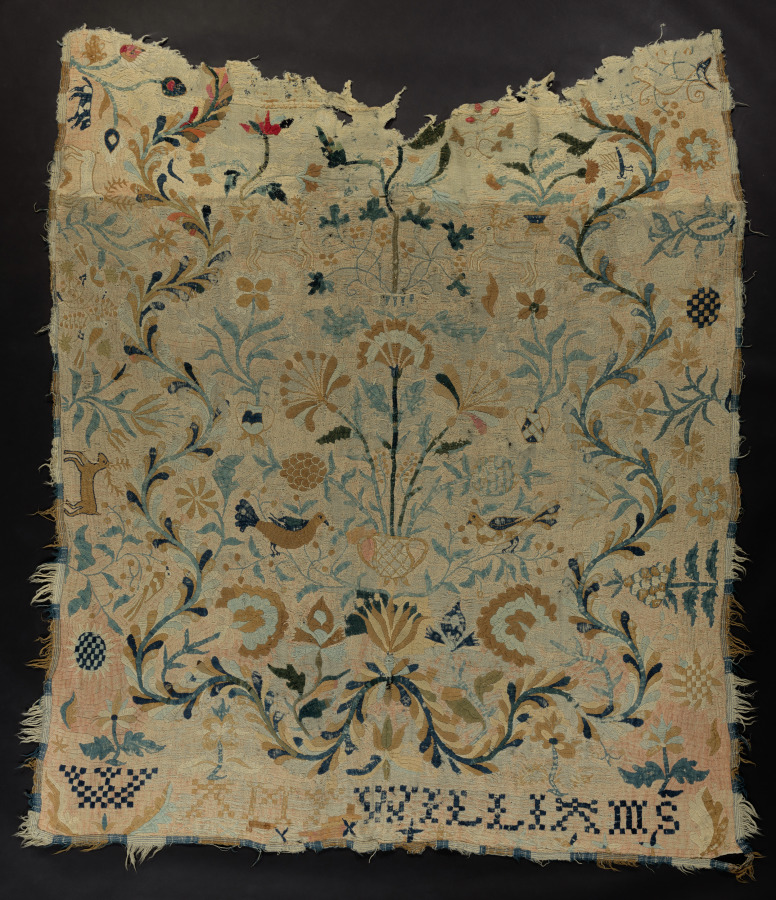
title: Bed Rug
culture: America, late 18th Century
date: c. 1799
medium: Plain weave wool, wool embroidery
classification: Embroidery